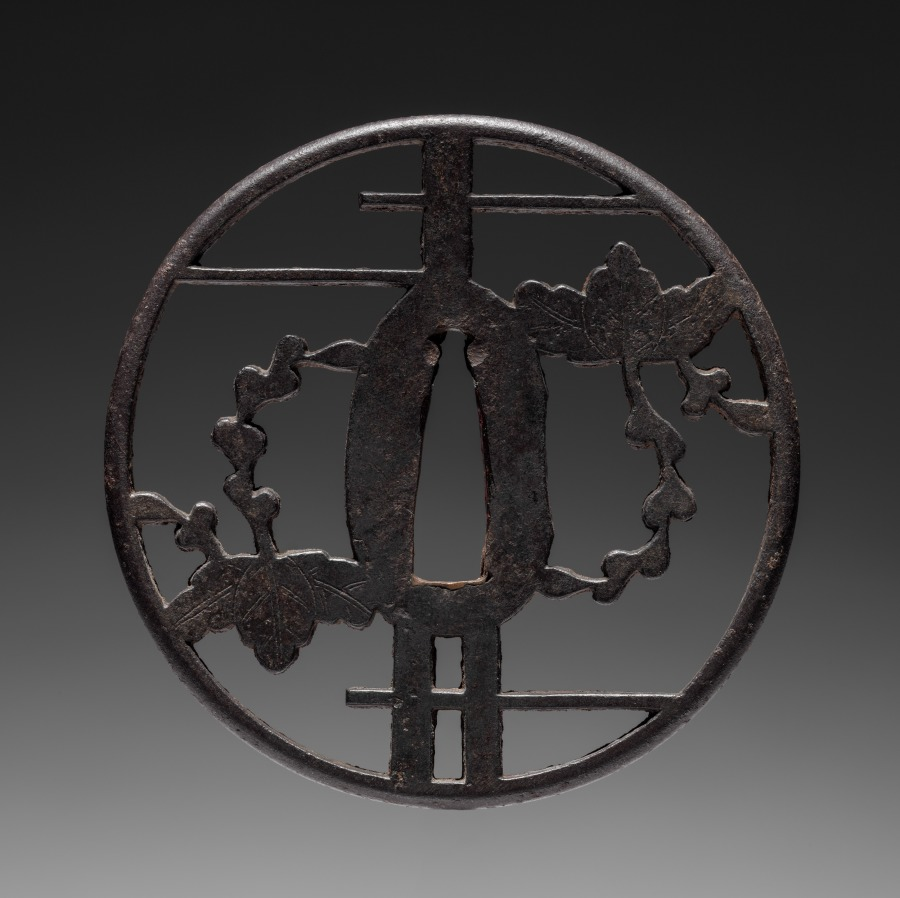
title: Sword Guard (Tsuba)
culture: Japan, possibly Edo period (1615-1868)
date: c. 1615–1868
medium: iron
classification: Arms and Armor